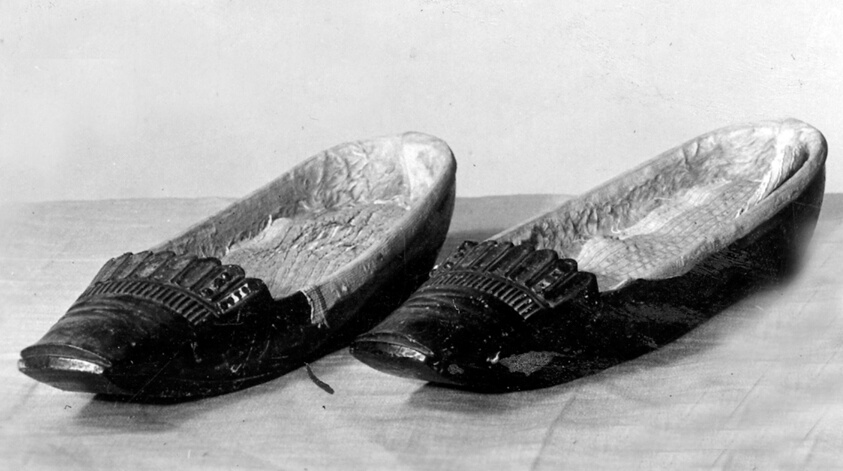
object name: Textile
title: Pair of Sabots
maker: France, Normandy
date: c.1780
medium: Wood, carved with inset jewels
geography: Normandy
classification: textile; shoes - misc; costume accessory - shoe; costume; dress (garment); clothing